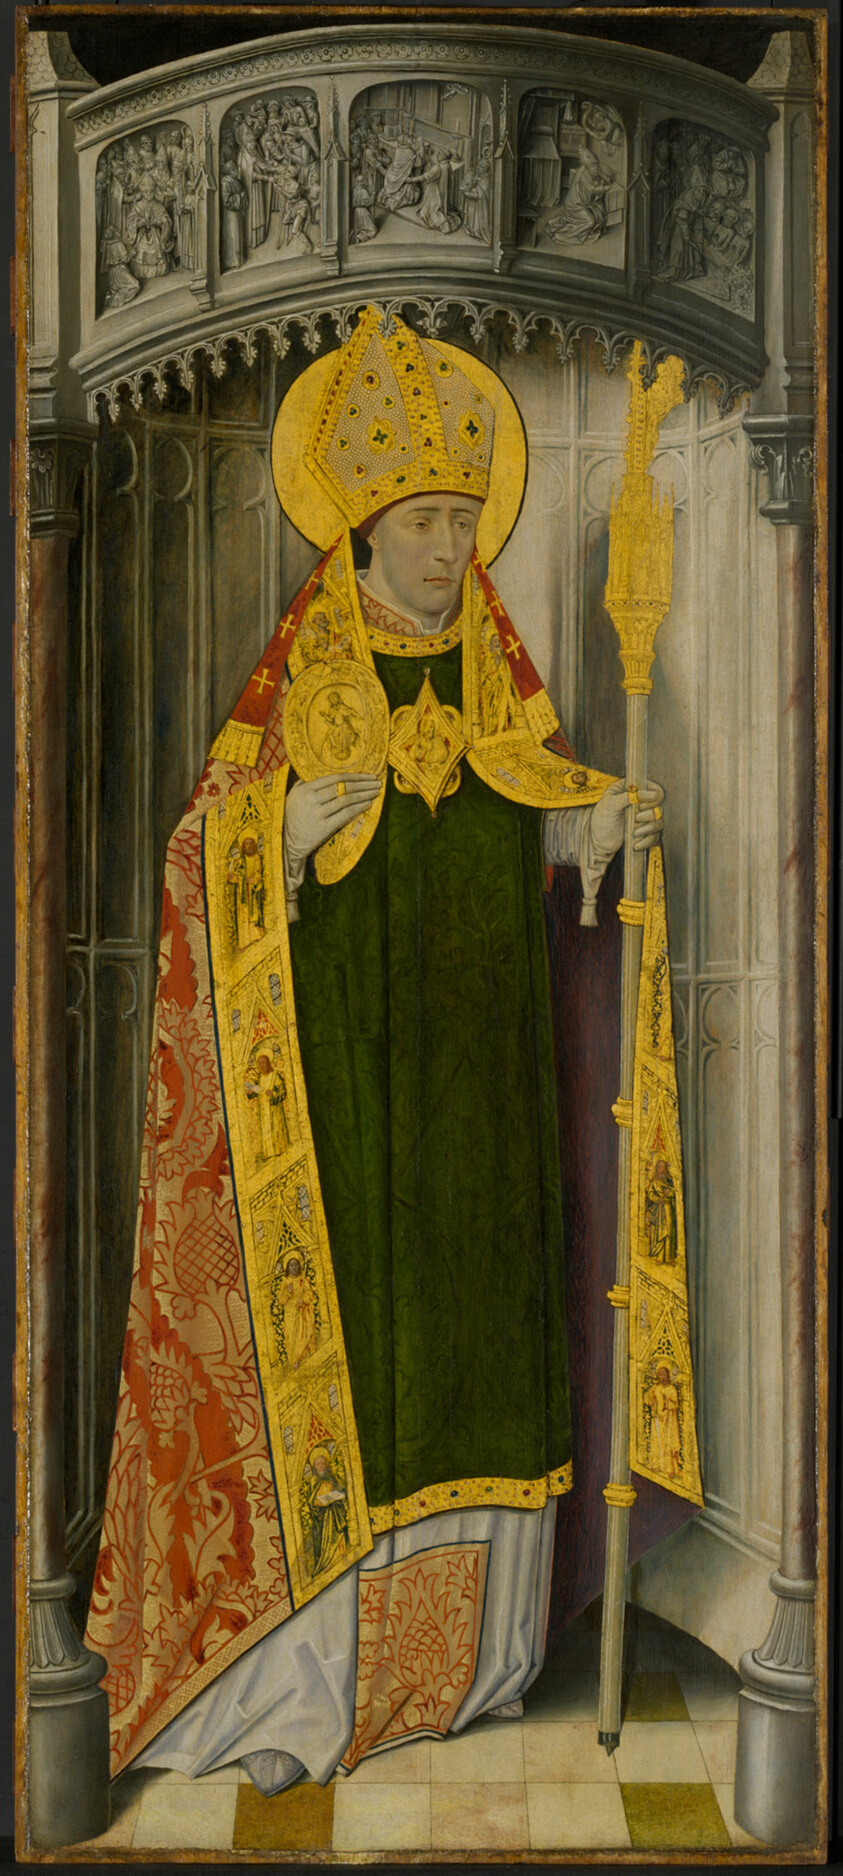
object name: Painting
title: Altarpiece from Thuison-les-Abbeville: Saint Honoré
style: 15th century, sixteenth century, 16th Century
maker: French; Picardy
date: c. 1495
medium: Oil on panel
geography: France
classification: oil on panel; france; french; oil paintings (visual works); paint; painting; european painting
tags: saints, architechture, architecture, architecture, Christian subjects, Christianity, France, French, gold (color), religion, religious, religious attire, vestments, Century of Progress, world's fairs, Chicago World's Fairs